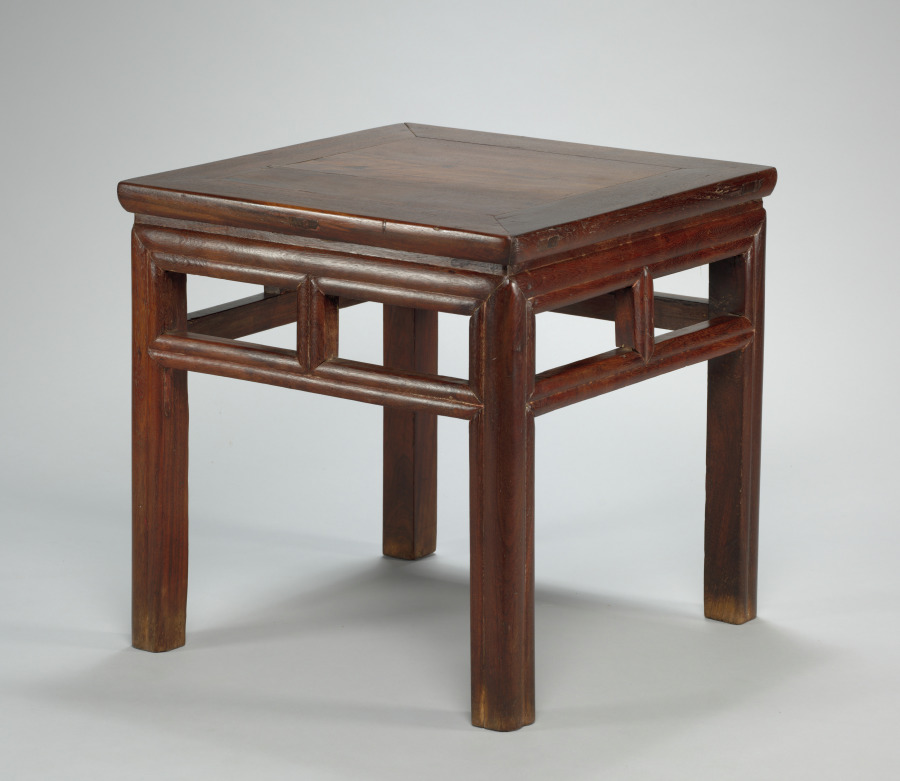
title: Stool (2 of 2)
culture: China, Qing dynasty (1644-1911)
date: 1700–1725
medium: Chicken-wing wood (jichimu)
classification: Furniture and woodwork